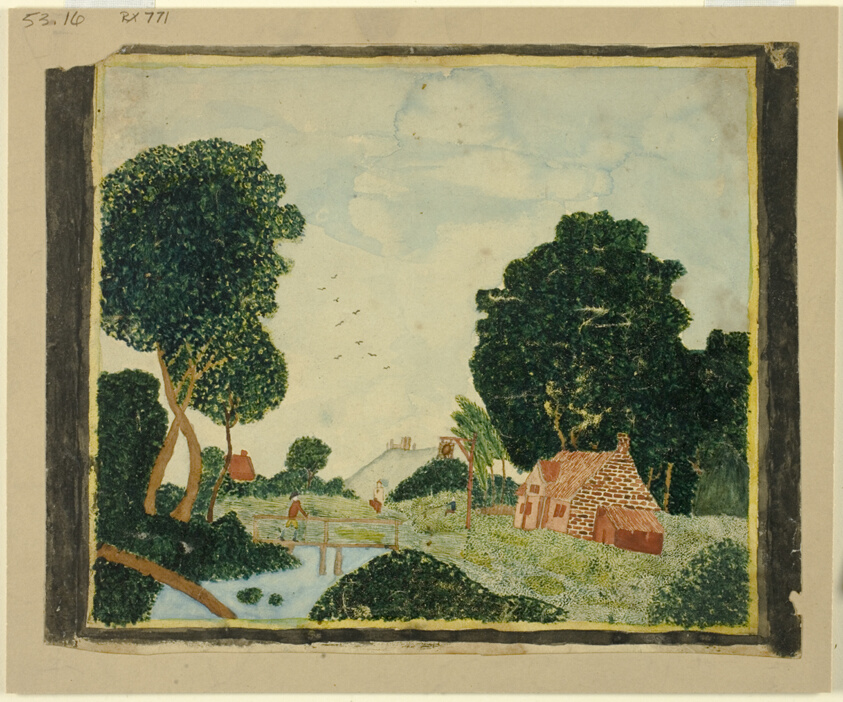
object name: Drawing and Watercolor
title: Landscape with an Inn and a Bridge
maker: Orra Louise White (American, 1796-1863)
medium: Watercolor over graphite on cream wove paper, laid down on tan board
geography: United States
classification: watercolor; drawings (visual works); prints and drawing